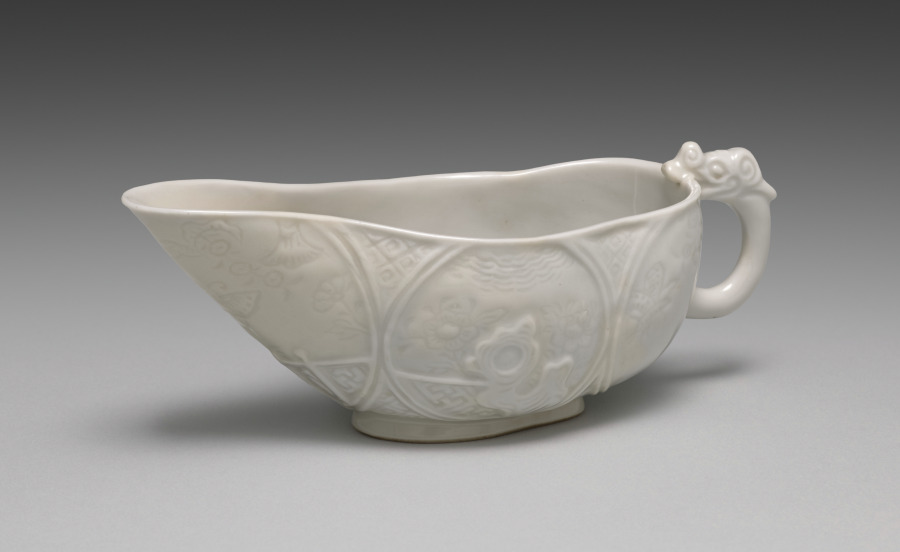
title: Water Cooler with Chinese Gardens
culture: Japan, Meiji period (1868–1912)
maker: Seifū Yohei III (Japanese, 1851–1914)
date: 1893–97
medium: Porcelain with molded and carved designs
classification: Ceramic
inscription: Artist's seal beneath the handle.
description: Unlike most pieces by the Seifu Yohei studio, this one bears a seal beneath the handle rather than on the base. The glaze and technique are identified on the box as taihakuji, or “great white porcelain,” an important early invention Yohei III devised in 1872 that involved the combination of a distinctive translucent, creamy glaze over an ivory-colored clay body. The body’s two sides have garden scenes seen through windows. Designs of flowers and butterflies are incised in the spaces at both ends. The garden on the right-hand side of the vessel, seen through a round window, has a decorative rock with grasses beneath a cloudy sky; and on a tiled veranda, there is a teapot as well as a fan and two scrolls inserted into a double-handled urn or kettle atop a brazier. The garden on the left-hand side has two enormous flowers below what may be either a cloud or a rippling pond; a garden rock—or perhaps a carved wood sculpture—with a circular perforation sits on what appears to be a veranda. While the details may be open to interpretation, the setting is a rather glamorous Chinese residence or palace with a superbly tended garden in spring or summer.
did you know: This water cooler has a handle with a dragon head.